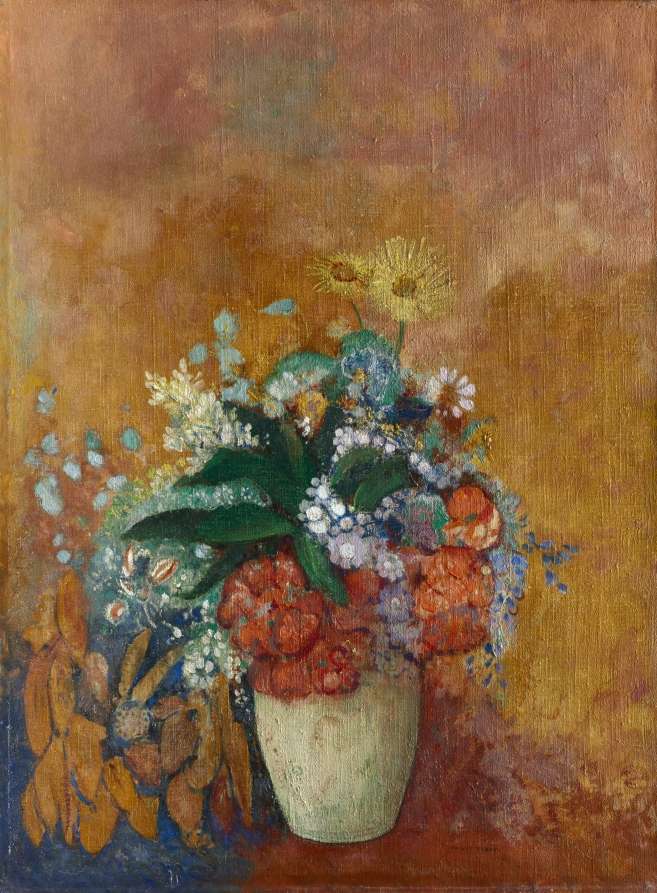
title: Vase of Flowers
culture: France, late 19th-early 20th Century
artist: Odilon Redon (French, 1840–1916)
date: c. 1905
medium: oil on fabric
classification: Painting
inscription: Signed lower right: odilon redon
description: Rapturous flower still lifes like this dominated the last decade and a half of Odilon Redon’s career and provided his greatest commercial success. His interest in plants and flowers began in his youth; child of wine producers, he grew up northwest of Bordeaux and was sensitive to fluctuations in weather, light, and temperature affecting the grape harvest. When he was 20, Redon met Armond Clavaud, a botanist and draftsman who illustrated his own compendium of flowers of the Bordeaux region. Clavaud’s meticulously rendered drawings sparked the young Redon’s imagination and helped to instill his desire to paint “nature, as seen in a dream.”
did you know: Redon returned to the subject of flowers many times throughout his career. His interest in plants may have been inspired by his friend and mentor Armand Clavaud, a botanist and illustrator who lived in Redon's hometown of Bordeaux.